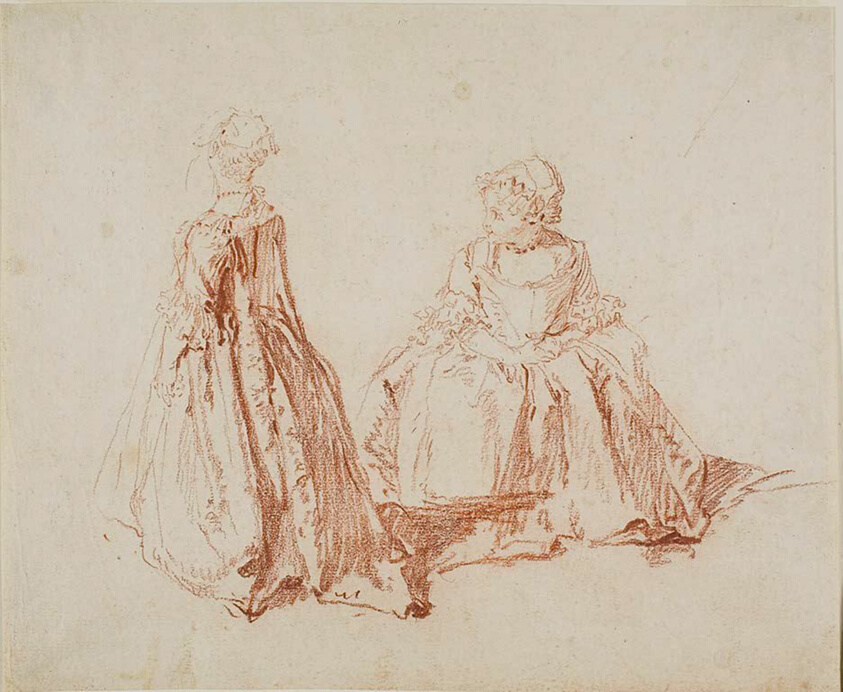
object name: Drawing and Watercolor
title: Study of Two Small Girls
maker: Nicolas Lancret (French, 1690-1743)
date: c. 1725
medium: Red chalk on ivory laid paper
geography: France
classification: chalk; drawings (visual works); prints and drawing